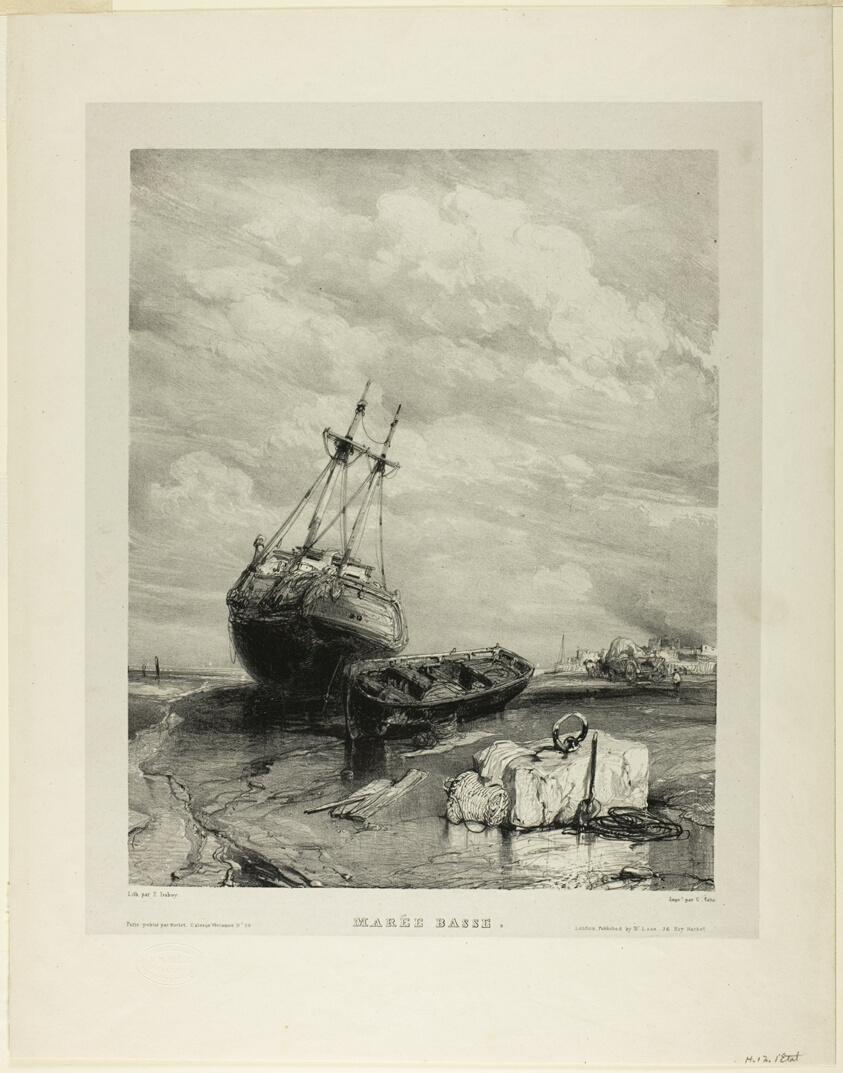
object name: Print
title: Low Tide, plate six from Six Marines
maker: Eugène Isabey (French, 1803-1886); printed by Charles Étienne Pierre Motte (French, 1785-1836)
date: 1833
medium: Lithograph in black on light gray China paper laid down on ivory wove paper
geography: France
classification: lithograph; print; prints and drawing